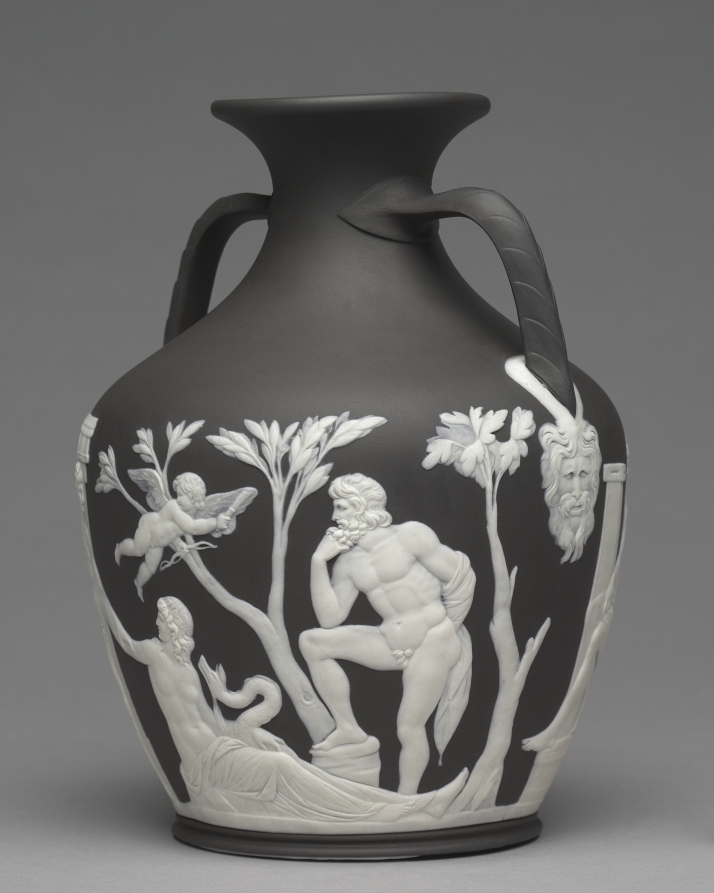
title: Portland Vase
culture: England, Staffordshire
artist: Josiah Wedgwood and Sons (Britain, Staffordshire, est. 1759)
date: c.1790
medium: jasperware with applied decoration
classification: Ceramic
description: The original Portland Vase is a Roman antiquity, made of dark-blue glass, dating from the first century AD. Such a rare archaeological find fascinated aristocratic collectors and artists alike, and eventually the vase came into the hands of the 3rd Duke of Portland in the 1780s. Around 1790 the duke lent the vase to the potter Josiah Wedgwood to make exact replicas in ceramic, of which the Cleveland example is one of the first editions. Eventually, the 4th Duke of Portland deposited the original Roman vase in the British Museum, where it resides today.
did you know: While the scene depicted here is not known for certain, many scholars believe that the Portland Vase portrays the wedding of Peleus and Thetis from Greek mythology.